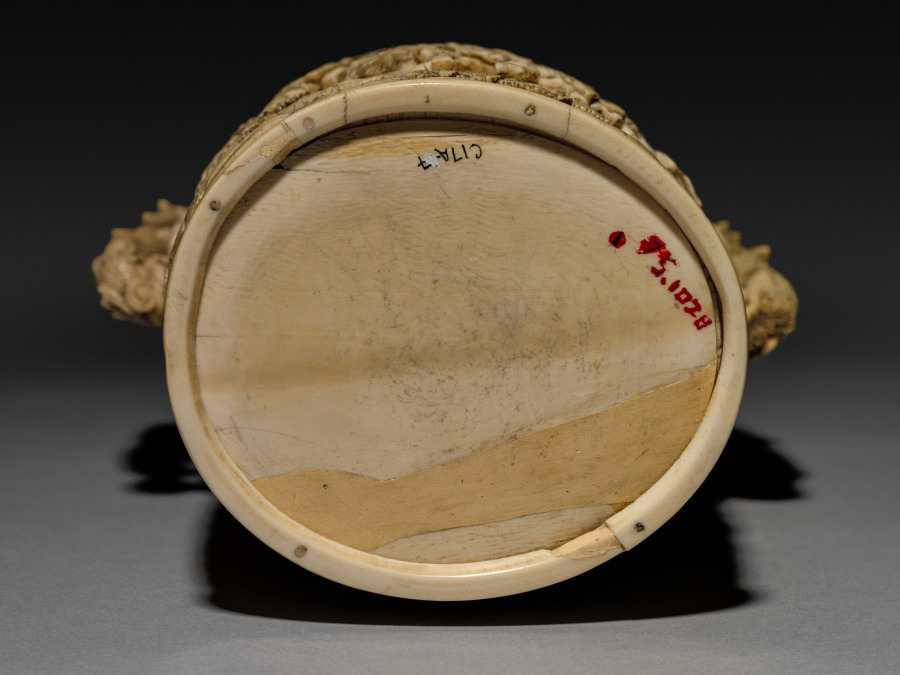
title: Carved Vase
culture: Japan, Edo period (1615–1868) to Meiji period (1868–1912)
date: 1800s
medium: ivory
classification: Ivory